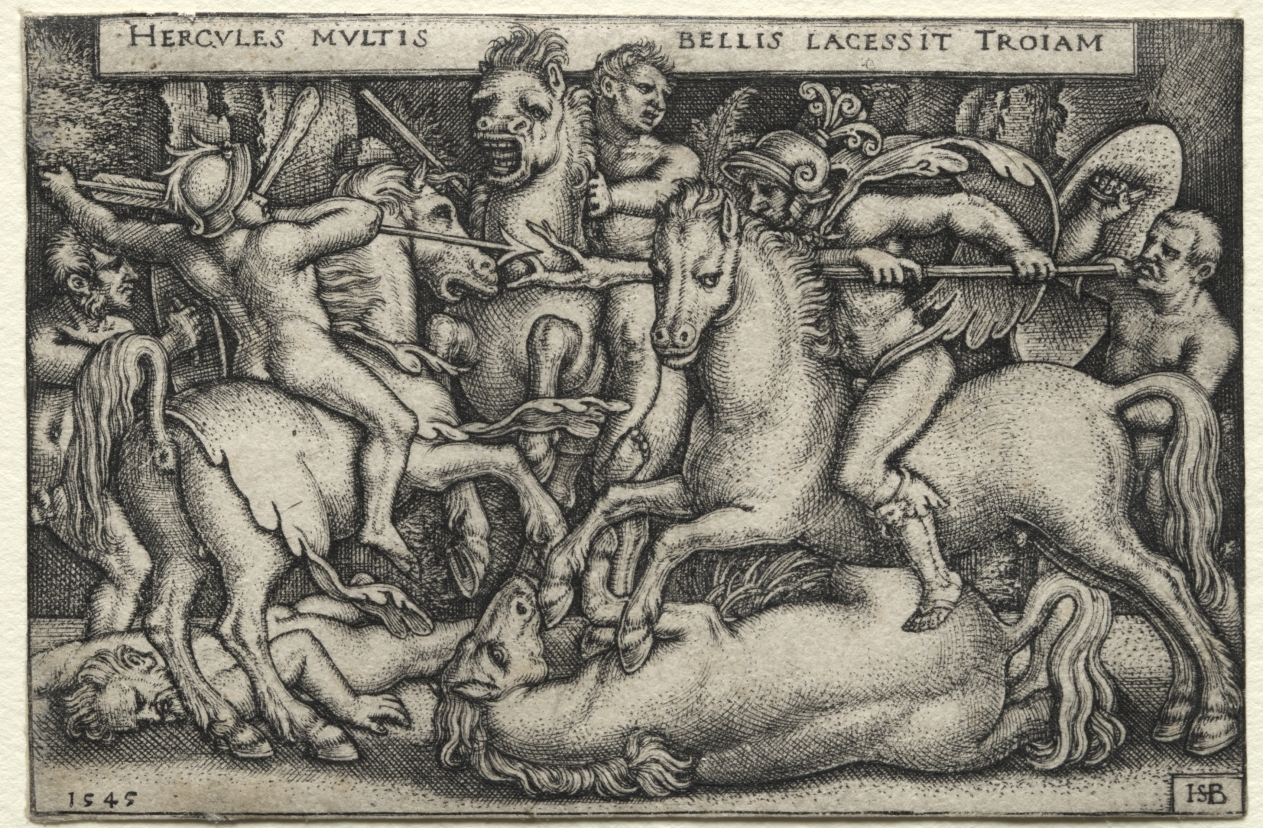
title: The Labors of Hercules: Hercules Conquering Troy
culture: Germany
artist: Hans Sebald Beham (German, 1500–1550)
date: 1545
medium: engraving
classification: Print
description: Beham was one of several German printmakers referred to today as the “Little Masters.” They established their artistic prowess by engraving remarkably small prints, appealing to collectors fascinated with miniature objects and curiosities. Here, Beham has packed 12 larger-than-life stories of the mighty Hercules into tiny prints. The series includes three of the 12 labors Hercules performed as penance for slaying his children in a fit of madness: Strangling the Nemean Lion, Killing the Lernean Hydra, and Dragging Cerberus from the Underworld. The other scenes depict tales from his life and the events preceding his death. The son of Jupiter and the mortal Alcmena, Hercules was both man and god. His saga of moral and physical trials made him one of the most popular classical heroes in Renaissance art.